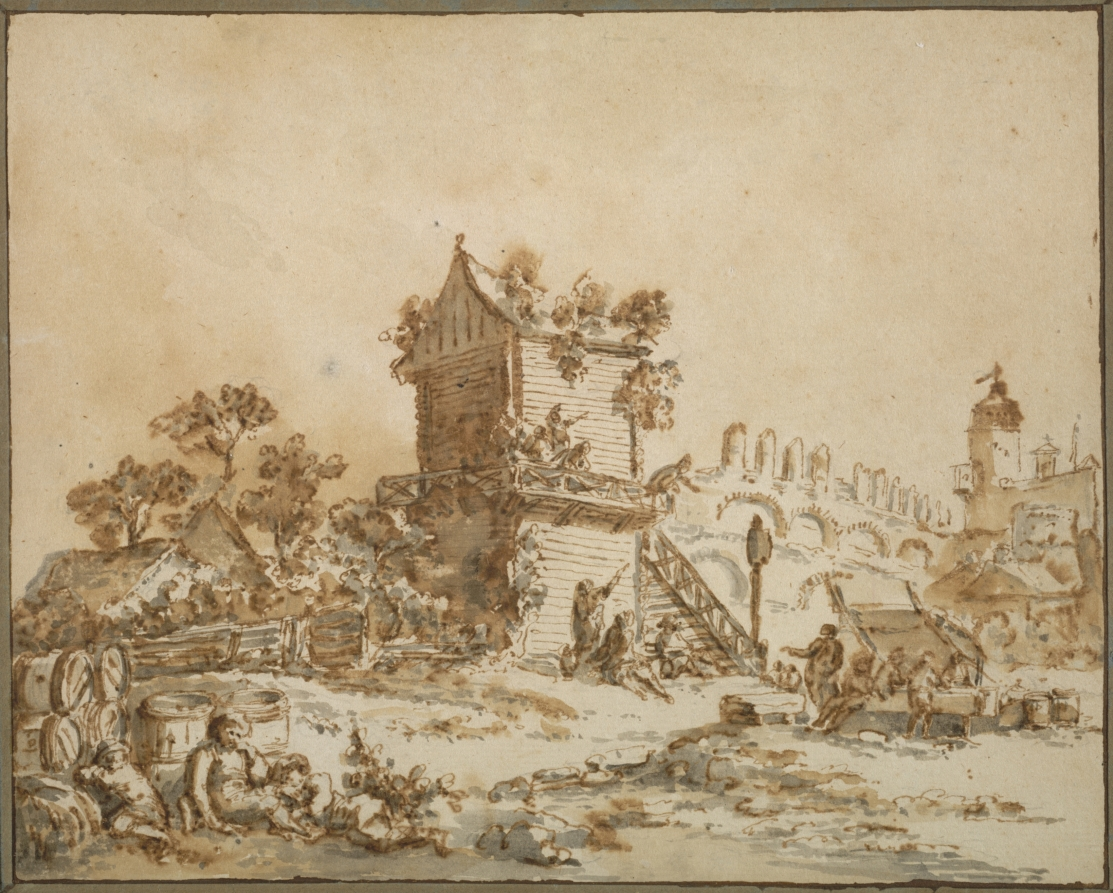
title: The Moscow Tavern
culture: France, 18th century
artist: Jean Baptiste Le Prince (French, 1734–1781)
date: c. 1773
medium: Pen and brown ink and brush and brown and gray wash on white laid paper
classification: Drawing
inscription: on overmount, lower center, in brown ink: vue prise De [la Coup?] [illegible] R[illegible]; verso of secondary support, upper left, in graphite: 836 [underlined]; upper left, in graphite: 603 / xl; lower center, in graphite: 65000 [r?][r underlined] Dessin avec la / gravure; lower left, in graphite: Leprince [underlined]; lower right, in graphite: cl 3419; lower center, in graphite: Cabaret de Moscou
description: French art during the 1700s often reflects an interest in the exotic, especially in imagery of lands then perceived as far away and unusual-such as Turkey and China, places with religions and cultural practices different from those of Western Europe. Le Prince developed his own type of exotic imagery based on the peoples and customs of Russia. But unlike most artists, who fabricated fantastic visions of such places, he based his work on his own observations made in Russia between 1758 and 1763. After returning to Paris, Le Prince continued to rely on his Russian experiences for artistic subject matter. This drawing shows a rustic structure built as an outdoor pleasure garden and drinking establishment. Le Prince, who was an innovative printmaker, developed the medium known as aquatint, which allowed artists to translate the broad tonal washes of ink drawing into a type of etching. Le Prince translated this drawing into an aquatint. For more about this technique, see the exhibition about French printmaking on view nearby in galleries 109 and 110.